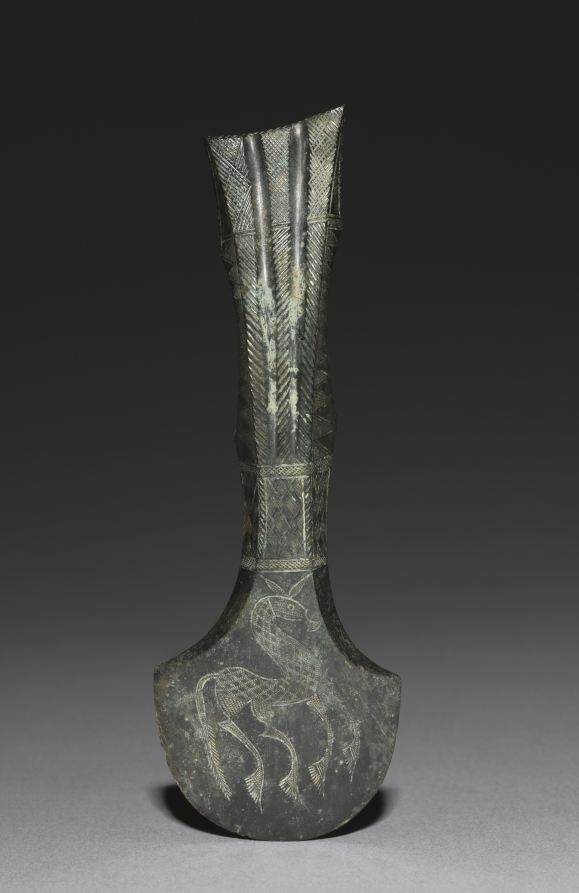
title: Axe Head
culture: Russia or Turkey, North-Central Caucasus, Kuban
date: 900–600 BCE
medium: bronze, cast in bi-part mold, polished, incised, and chased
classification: Metalwork